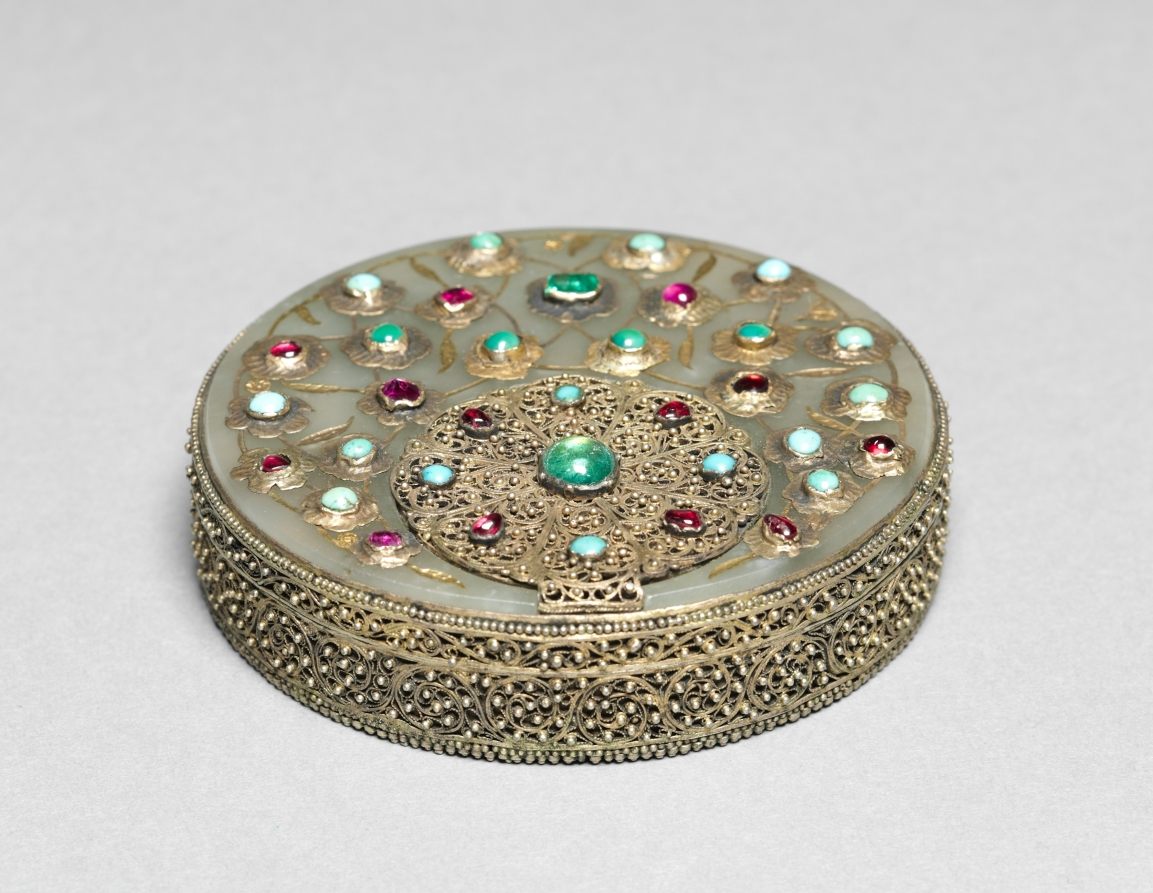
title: Box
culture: Turkey, 19th century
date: 1800s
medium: jade, gilt metal, turquoise, emeralds (?), rubies (?)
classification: Miscellaneous